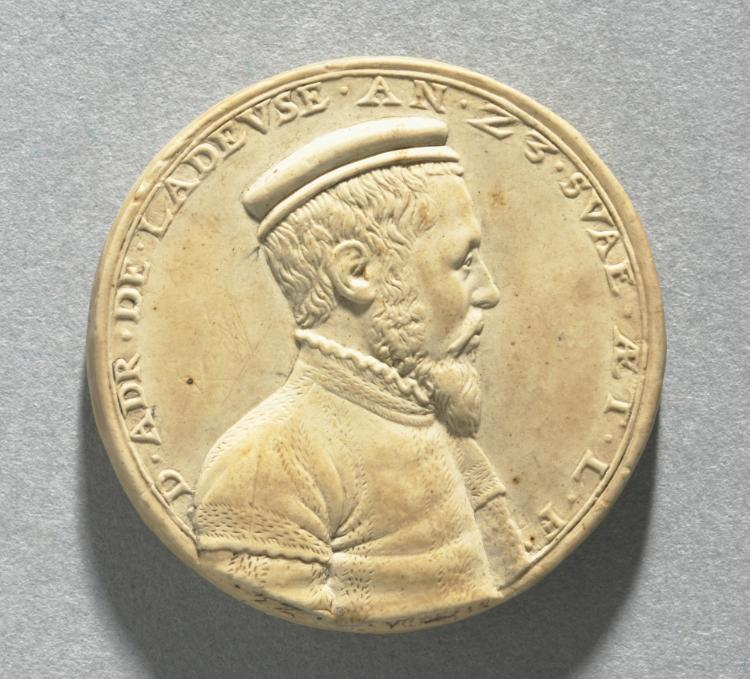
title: Model for a Medal of Adrien de la Deuse at Age 23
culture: Flanders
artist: attributed to Jacob Zagar (Flemish)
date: c. 1550–75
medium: hone (fine-grained whetstone)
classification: Sculpture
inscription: around the circumference: D.ADR. DE LA DEVSE.AN. 23.SVAE.AET.L.F.; inscribed under truncated arm of the sitter: "z"